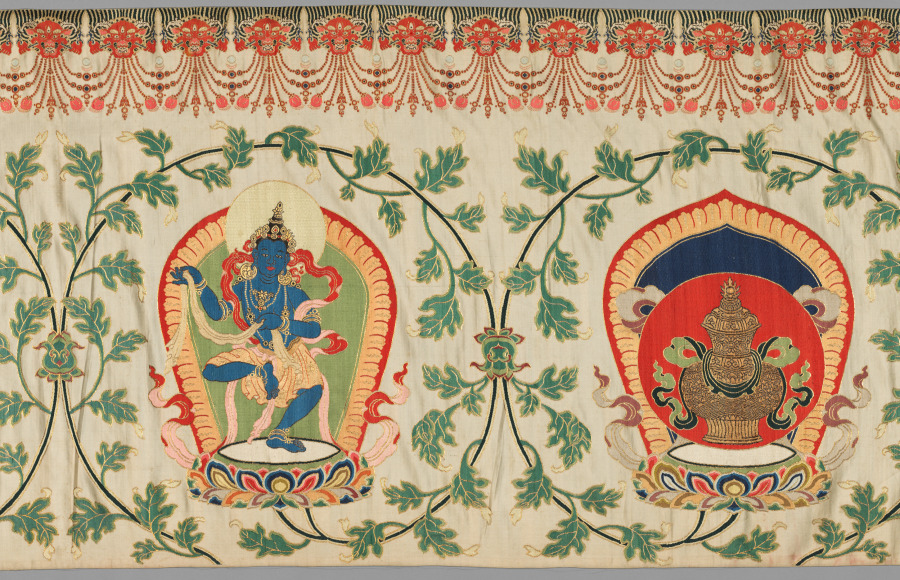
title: Brocaded Strip, known as "Imperial Tribute Brocade"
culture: China, Qing dynasty (1644-1911)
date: c. 1770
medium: brocaded satin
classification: Textile